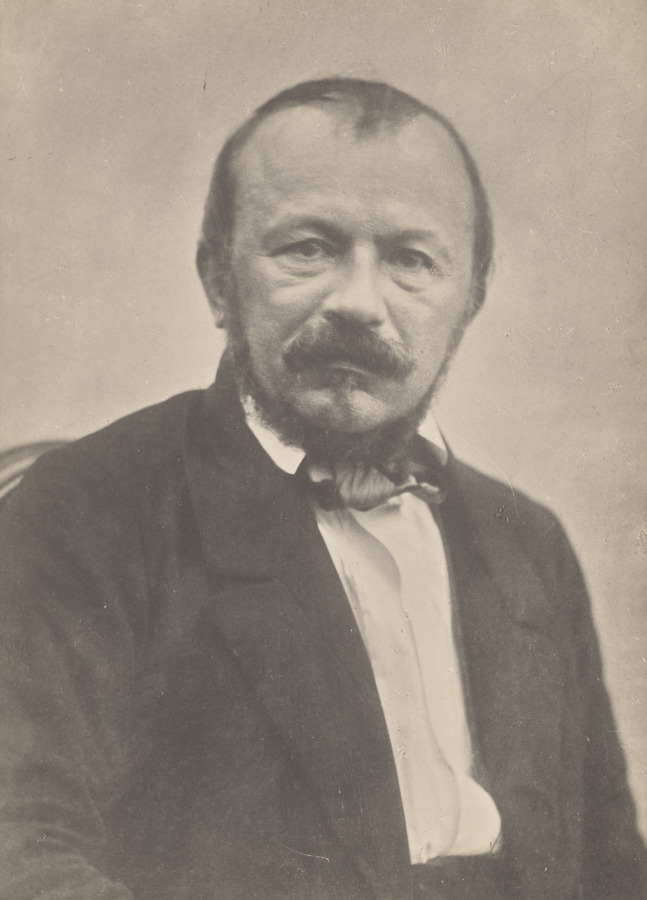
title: Gérard de Nerval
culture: France, 19th century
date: 1850s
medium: albumen print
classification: Photograph